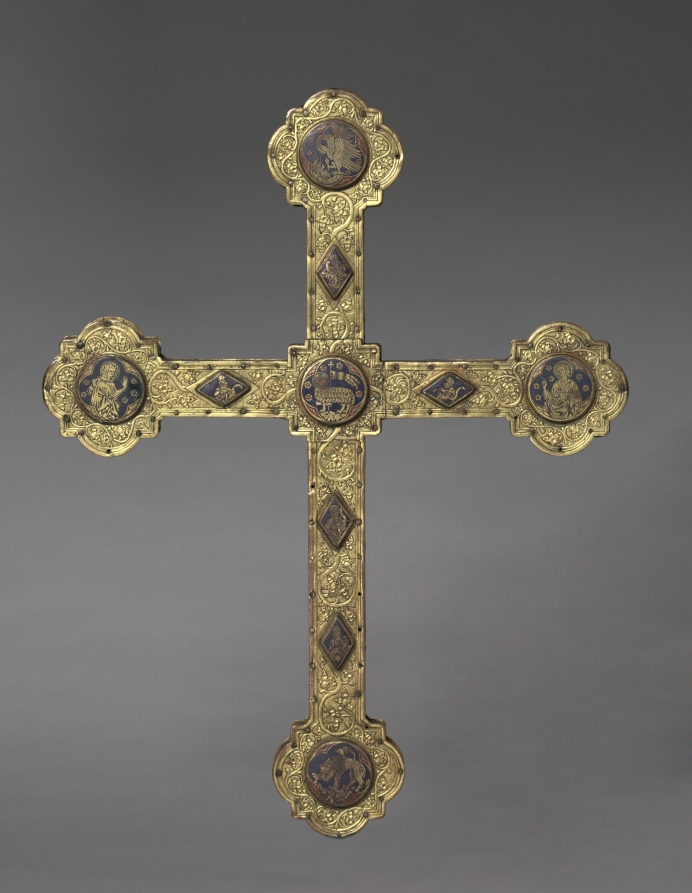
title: Altar Cross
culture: Germany or Austria, Upper Rhine, Constance, 14th century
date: c. 1300–1310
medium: gilt copper, champlevé enamel, gemstones, on wood core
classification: Metalwork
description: This cross is traditionally said to come from the Benedictine Abbey of Meherau on Lake Constance in today’s Austria. During the 12th and 13th centuries the abbey became wealthy through the acquisition of landed property. This beautiful cross would have likely embellished one of the abbey’s many altars where it symbolized Christ’s presence in the Mass.